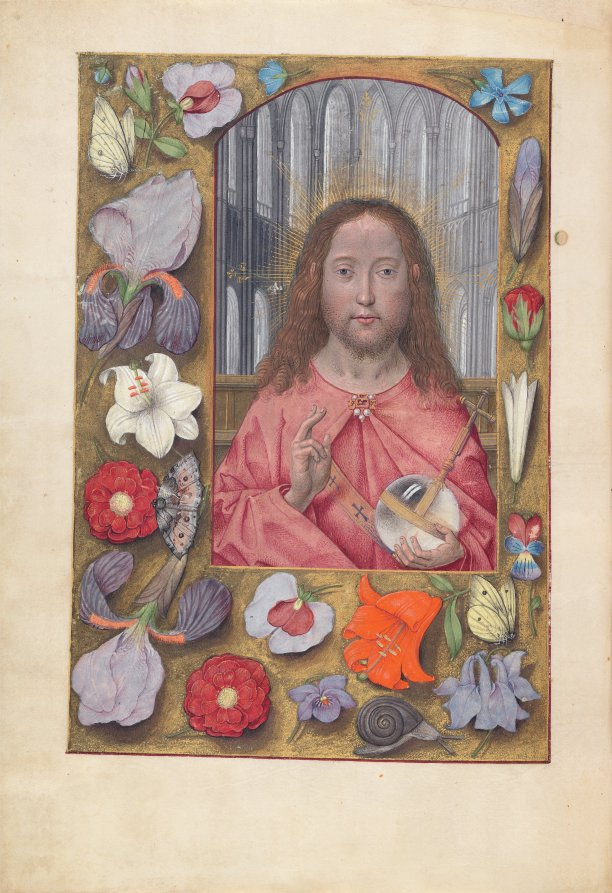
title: Hours of Queen Isabella the Catholic, Queen of Spain: Fol. 14v, Salvator Mundi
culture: Flanders, Ghent and Bruges, late 15th century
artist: Master of the First Prayerbook of Maximillian (Flemish, c. 1444–1519)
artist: and Associates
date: c. 1500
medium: ink, tempera, and gold on vellum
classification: Bound Volume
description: This manuscript was illuminated by a circle of at least five highly organized manuscript painters active in the Flemish cities of Ghent and Bruges. The principal illuminator was Alexander Bening, who painted the majority of the book's miniatures. Manuscripts produced by this circle of artists are renowned for the decoration of their borders, which typically feature a rich variety of realistically-painted flowers, birds, and butterflies. This prayer book, called a book of hours, was intended not for a cleric, but for the private devotions of a lay person-in this case, Isabella the Catholic, Queen of Spain (1451-1504). Isabella's coat of arms embellishes the book's frontispiece. It is unlikely that the book was commissioned by the Queen herself; rather, she probably received it as a diplomatic gift from someone courting her patronage, perhaps Cardinal Francisco Jimenez de Cisneros. A Franciscan friar, Jimenez was dependent upon Isabella for his advancement, first to the post of Queen's confessor in 1492, and then to Archbishop of Toledo in 1495.